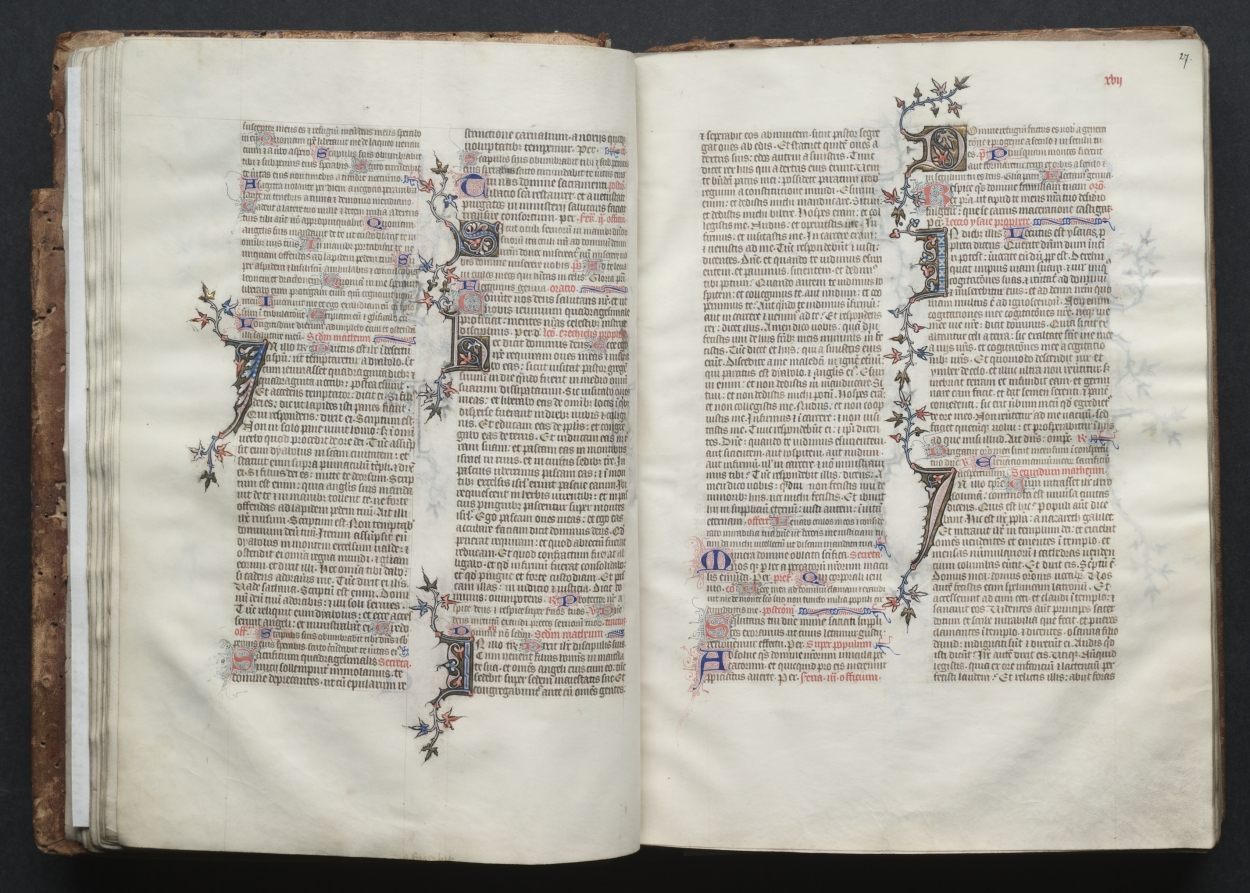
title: The Gotha Missal: Fol. 26v, Text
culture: France, Paris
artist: Master of the Boqueteaux (French)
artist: and Workshop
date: c. 1375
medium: ink, tempera, and gold on vellum; blind-tooled leather binding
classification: Bound Volume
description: The style and quality of this manuscript's decoration is typical of deluxe Parisian books made for aristocratic or royal patrons. Most of the book's decoration appears to be the work of the Master of the Boqueteaux, an artist active at the court of King Charles V (died 1380). His style was apparently shared by a number of book illuminators working in and around Paris. It is very possible that the Gotha Missal belonged to Charles V, but is not provable because the manuscript has no royal portraits and lacks a colophon. Given the book's magnificent decoration, however, it would seem that it was produced for a Valois prince, if not for the king himself. The manuscript receives its name from the German dukes of Gotha, its later owners.